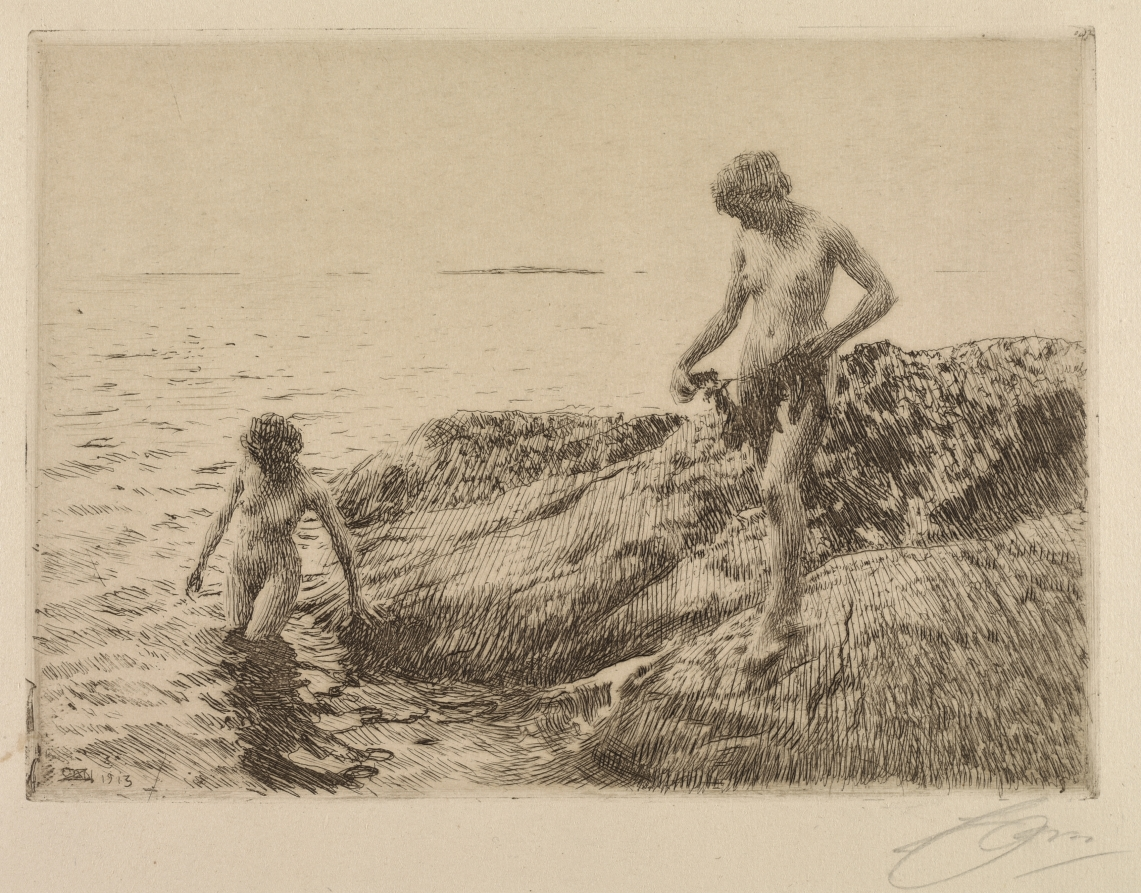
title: Seaward Skerries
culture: Sweden, 20th century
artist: Anders Zorn (Swedish, 1860–1920)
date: 1913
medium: etching and drypoint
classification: Print